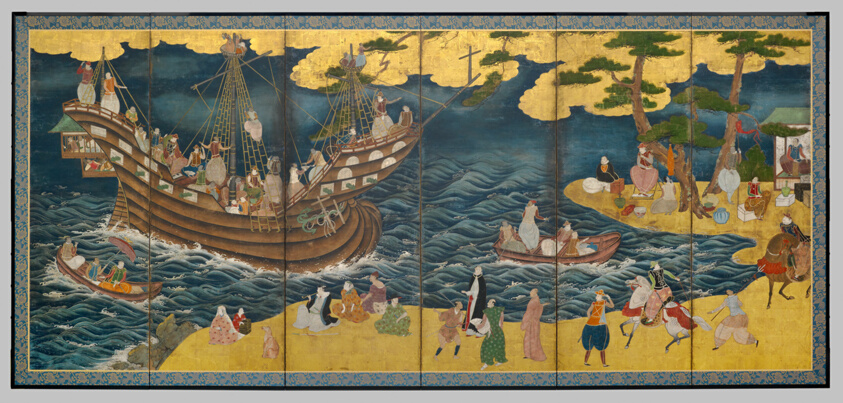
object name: Furniture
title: Southern Barbarians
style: Japanese (culture or style)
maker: Artist unknown; Japanese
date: mid 17th century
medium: Pair of six-panel screens; ink, colors, and gold on paper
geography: Japan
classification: furniture